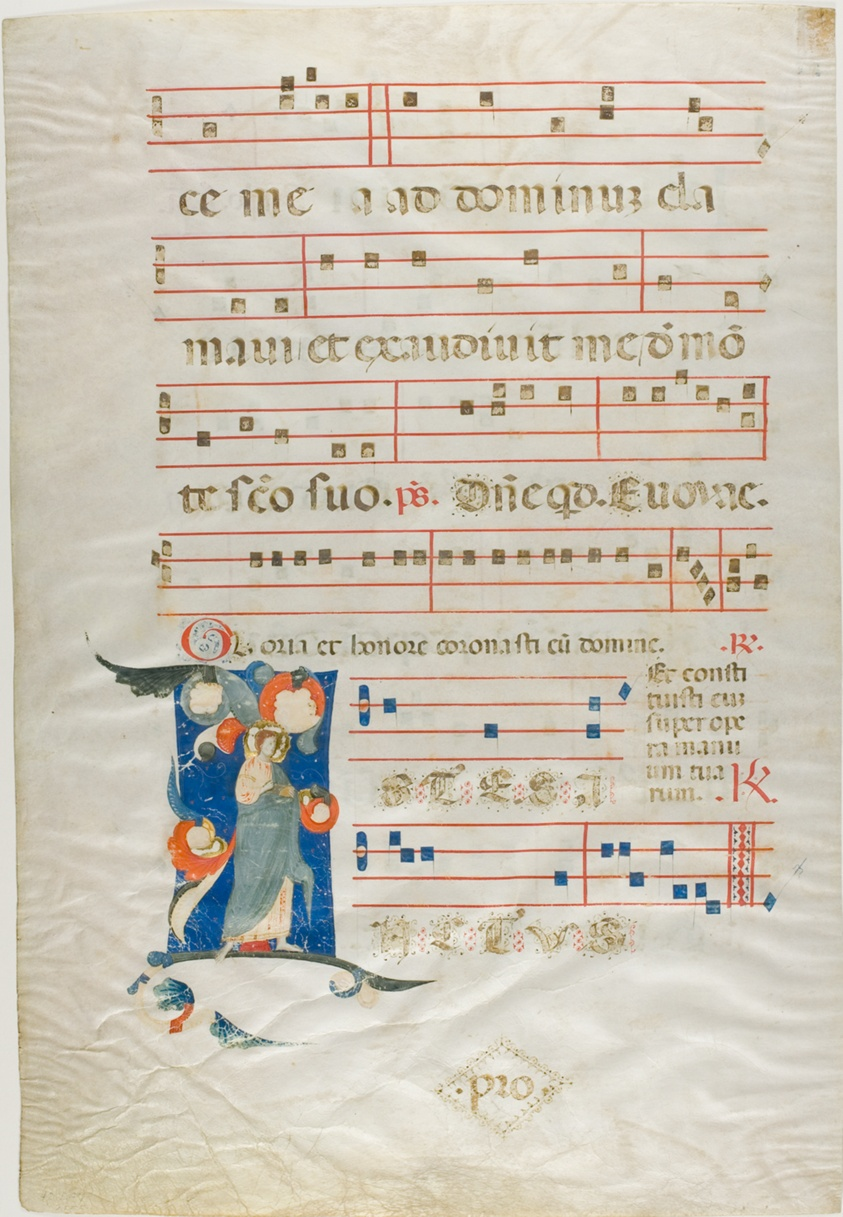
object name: Drawing and Watercolor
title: Nimbed Saint in a Historiated Initial "I" from an Antiphonary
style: medieval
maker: Italian (Rimini); Neri da Rimini (Italian, active 1300-1338)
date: 1310/15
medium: Manuscript cutting in tempera and gold leaf, with gothica textualis inscriptions in Latin in black ink, ruled in red ink, and with other decorations, on parchment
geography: Italy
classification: tempera; manuscript; drawings (visual works); prints and drawing